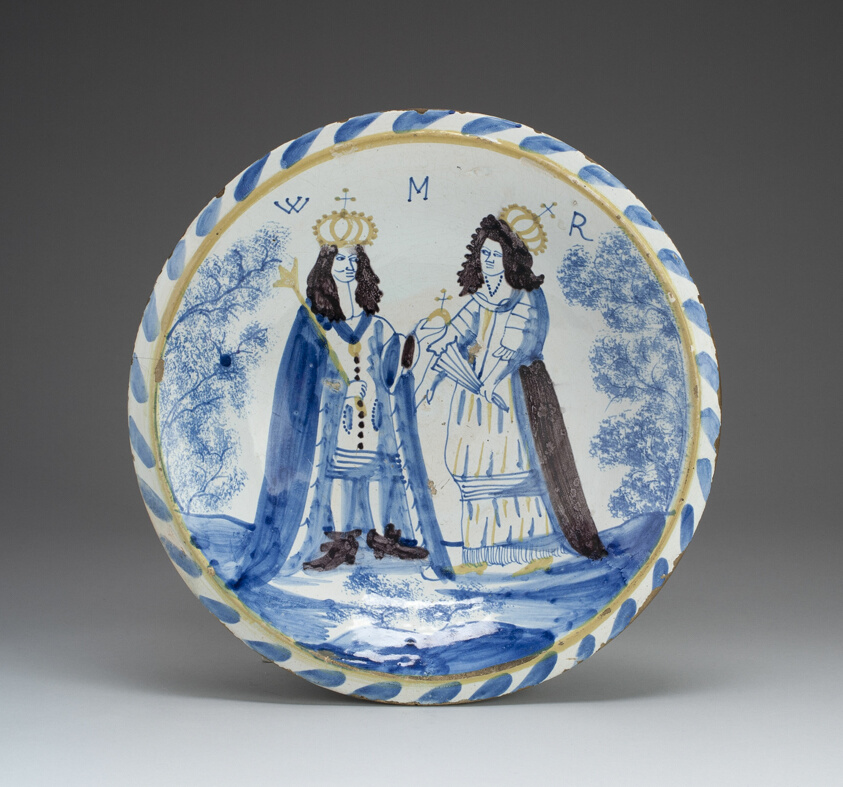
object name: Ceramics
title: Charger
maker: Bristol, England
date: 1700/25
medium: Tin-glazed earthenware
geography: Bristol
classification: earthenware; ceramics; european decorative arts